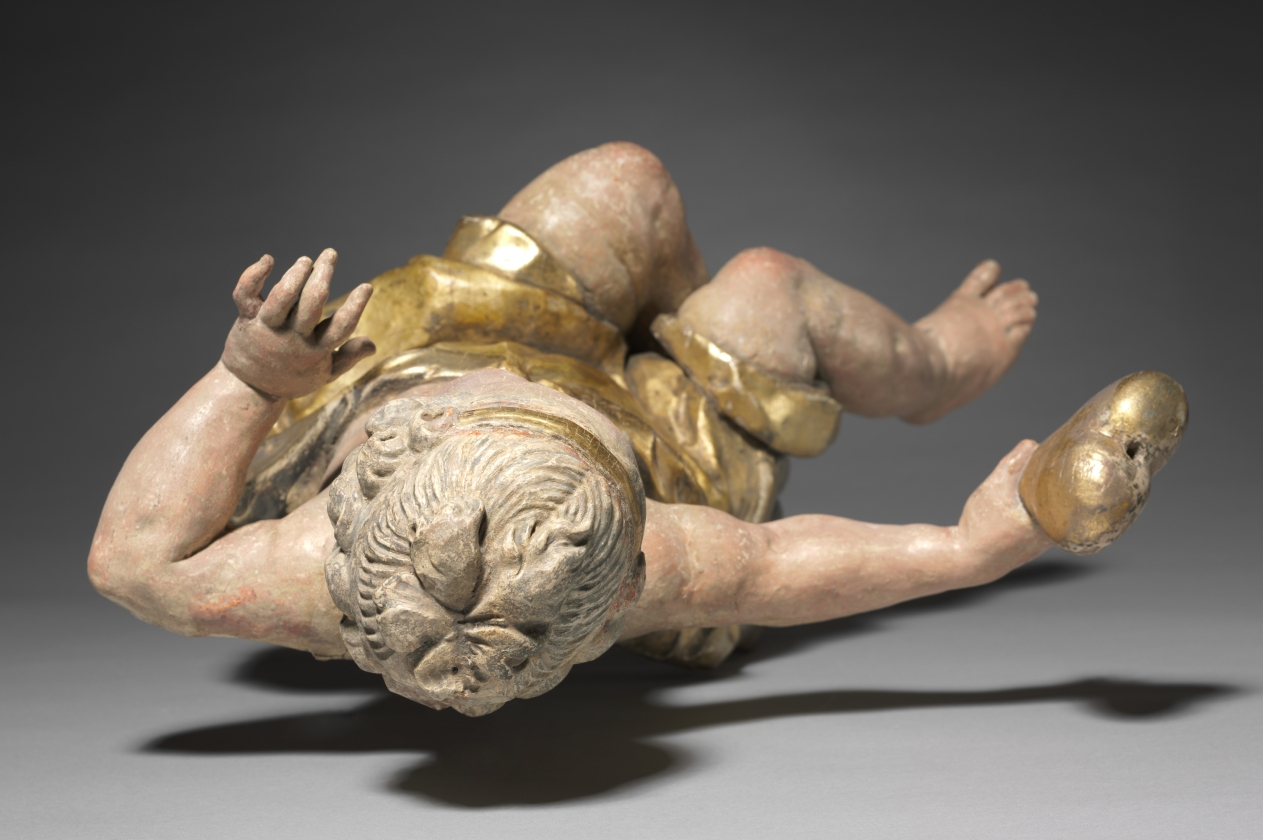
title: Putto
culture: Germany, near Bamberg, 18th century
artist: Ferdinand Tietz (Austrian, 1708–1777)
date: mid-1700s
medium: painted and gilded wood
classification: Sculpture